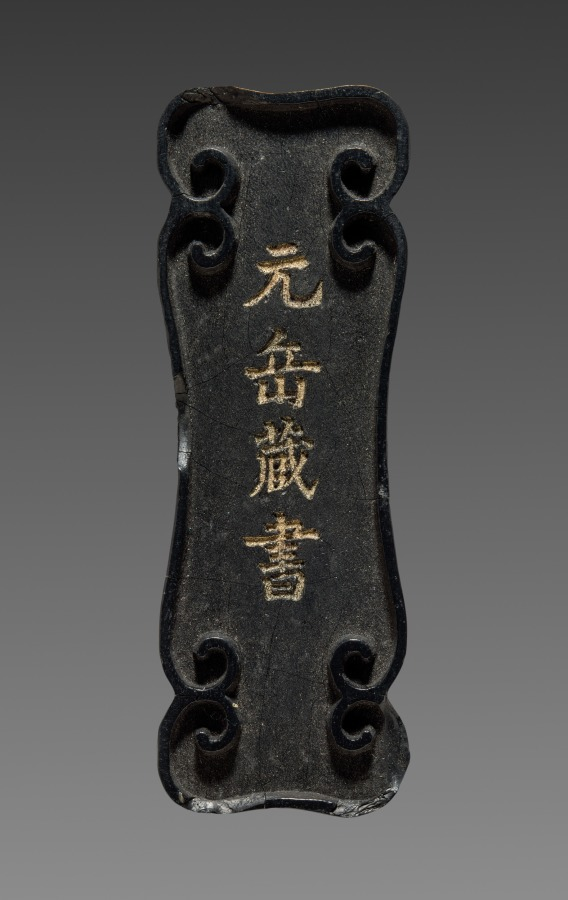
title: Ink Cake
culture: China, Qing dynasty (1644-1911)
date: 19th Century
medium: ink cake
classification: Miscellaneous